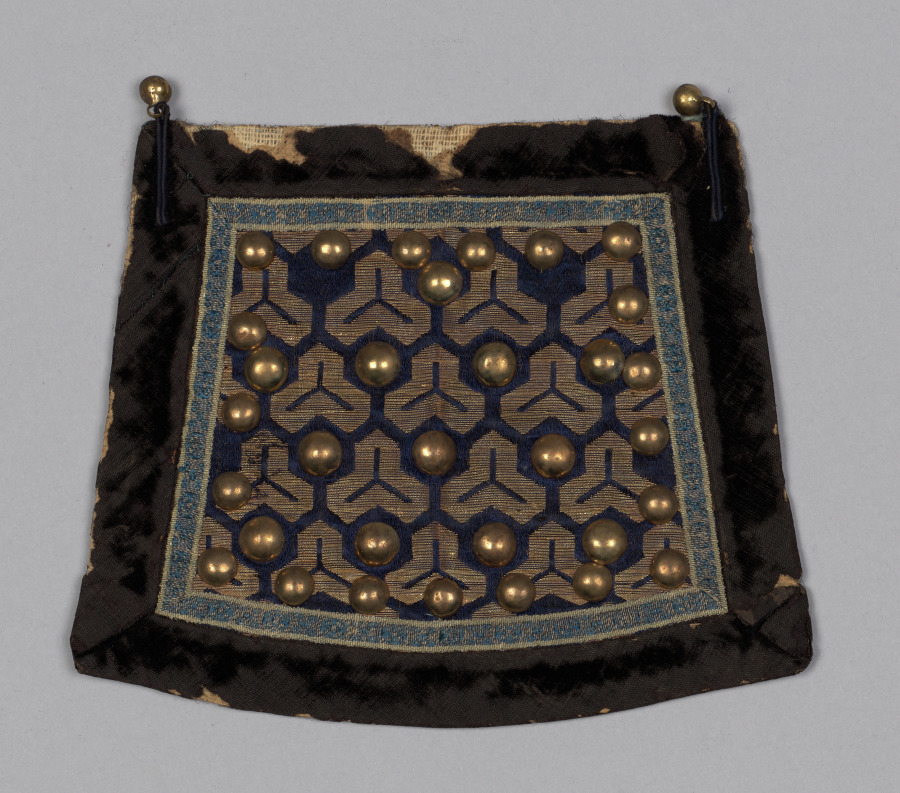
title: Ceremonial Uniform: Center Flap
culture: China, Qing dynasty (1644-1911)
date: 1644–1911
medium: satin weave silk with gold metal thread embroidery; supplementary weft; black velvet; metal (brass?); lined in blue silk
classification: Arms and Armor